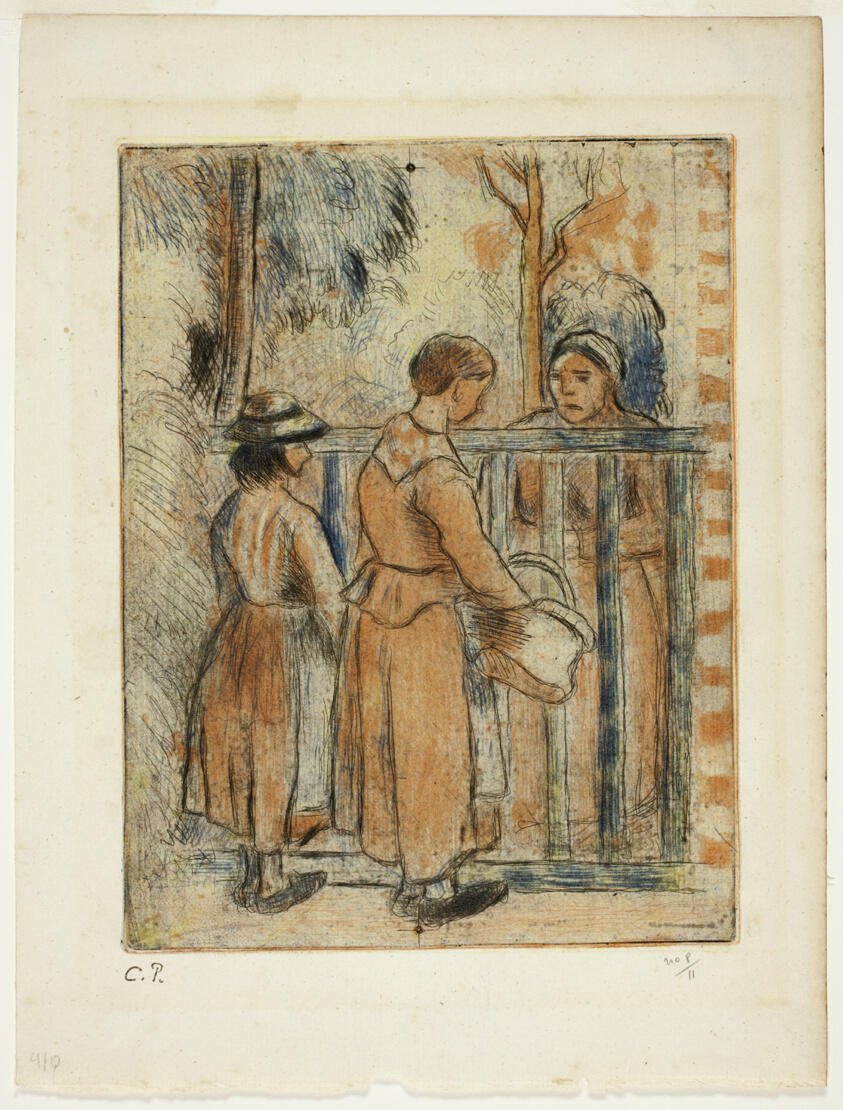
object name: Print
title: Beggar Women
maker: Camille Pissarro (French, 1830-1903); printed by Alfred Porcabeuf (French, 1895-c. 1946); printed by Jean Cailac (French, active 20th century)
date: c. 1894, printed 1930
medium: Color etching, drypoint, and aquatint on ivory laid paper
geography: France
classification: etching; print; prints and drawing